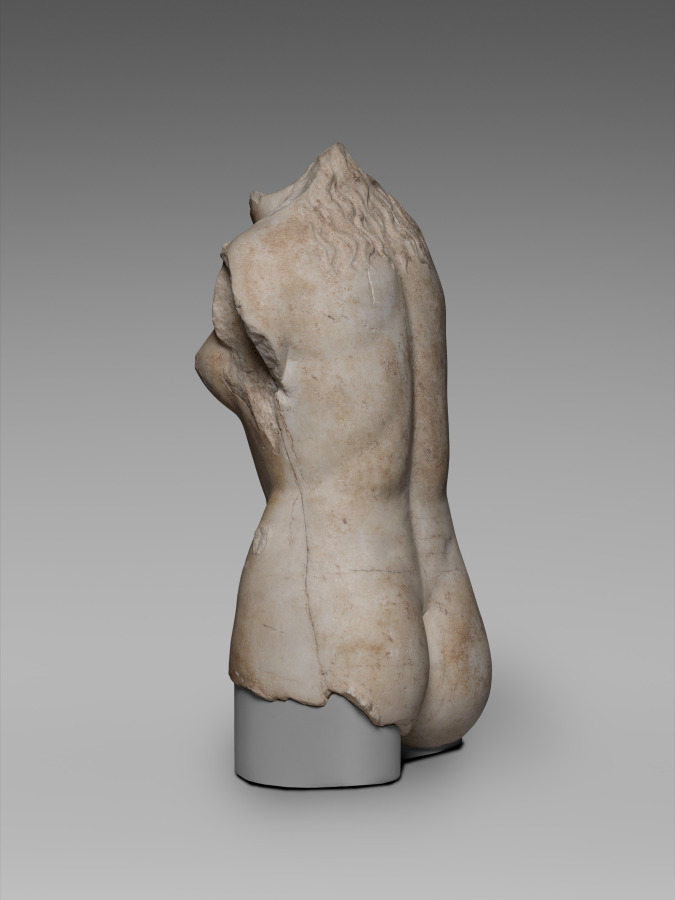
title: Aphrodite Torso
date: 200–1 BCE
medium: Thasian marble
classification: Sculpture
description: This torso can be identified through its nudity and pose as the Greek goddess of love, Aphrodite. Based on the now-lost Aphrodite of Knidos, a revolutionary marble sculpture created by Praxiteles of Athens in the mid-300s BCE, this sculpture belongs to a popular Greek and Roman type showing the goddess at her bath. With hips slightly shifted, she stood in a relaxed posture with most of her weight on one leg, probably with one hand modestly covering her pubic region and the other shielding her breasts or holding drapery. Alternatively, one or both hands may have tended to her wet hair, some of which falls over her neck and upper back.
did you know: This torso is based on the Aphrodite of Knidos, a Greek original by the master sculptor Praxiteles.